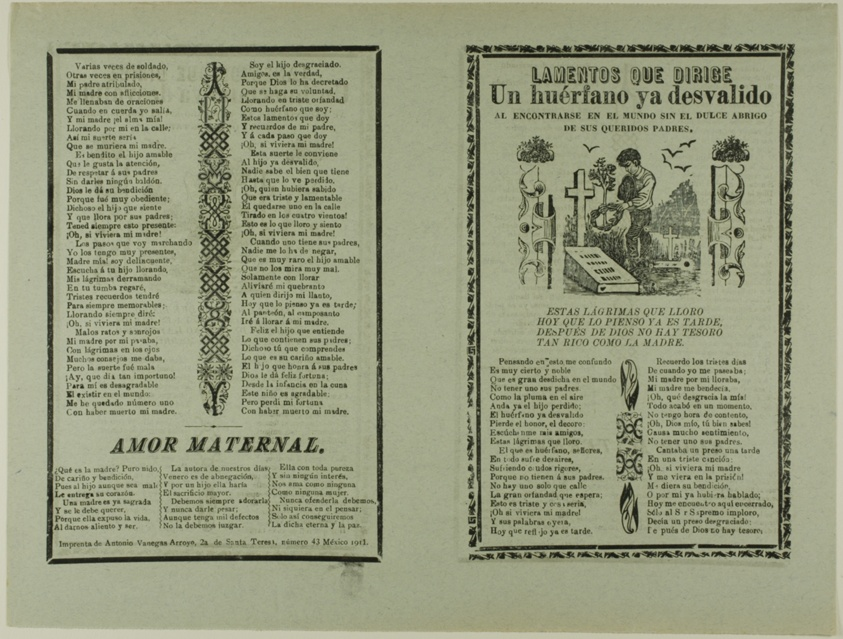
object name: Print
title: Lamentos que dirique (Laments That Direct)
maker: Attributed to Manuel Manilla; Mexican, 1830-c. 1900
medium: Relief print on paper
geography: Mexico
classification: relief etching; print; prints and drawing